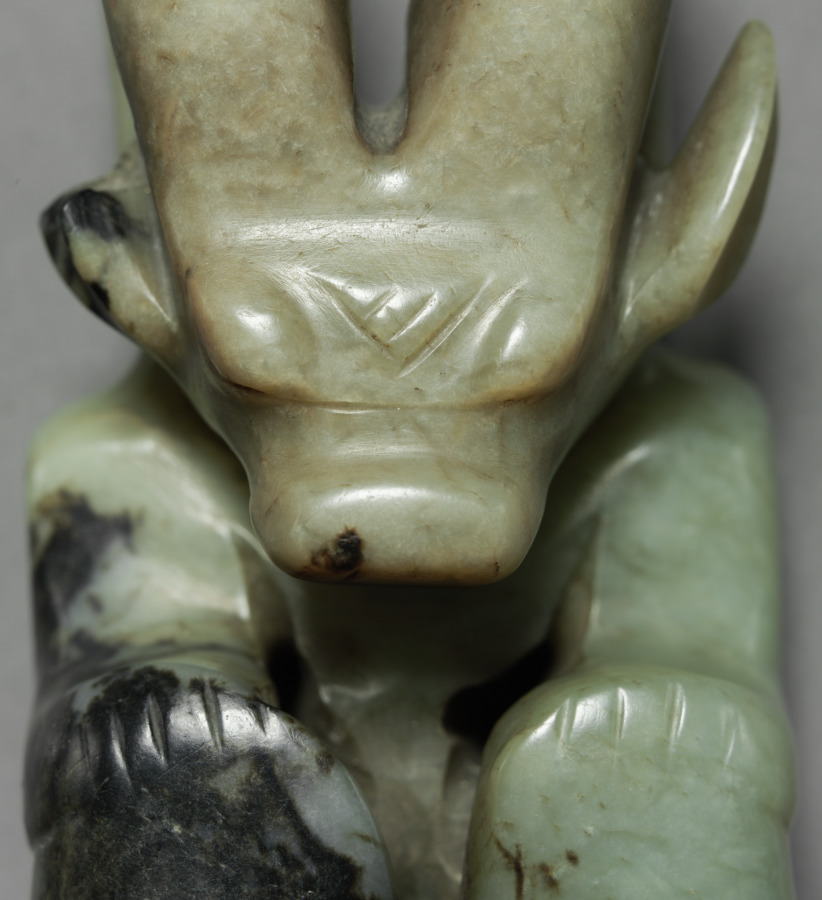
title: Amulet in the Form of a Seated Figure with Bovine Head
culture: Northeast China, Neolithic period, probably Hongshan culture (4700–2920 BCE)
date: c. 4700–2920 BCE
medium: jade (nephrite)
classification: Jade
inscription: There are two paper labels on the back of the jade pendant: one partial label with Chinese characters and one with the typed number "150".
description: With a bovine head and four horns, this seated figurine was a powerful ritual and shamanic symbol. Drill holes above its shoulders form two interconnected perforations for suspension, suggesting that the jade was originally used as a pendant, presumably by the shaman performing the tasks of journeying to and communicating with the supernatural realms.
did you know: CMA daringly acquired this masterpiece without knowing exactly what it was. Only after Chinese archaeologists started excavating similar jades in Northeast China could it be attributed to the Hongshan culture.